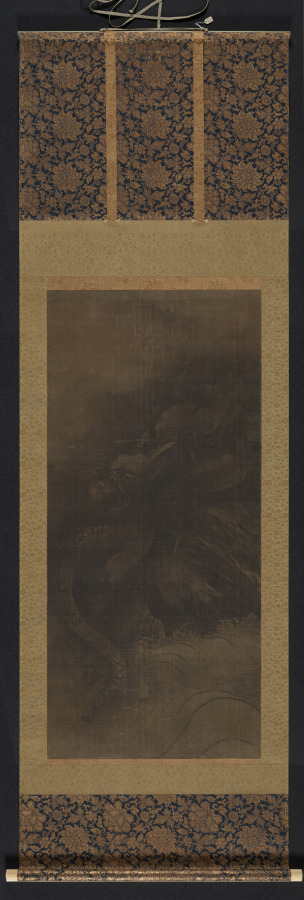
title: Dragon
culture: China, Southern Song dynasty (1127-1279)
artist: Fachang Muqi (Chinese, 1220–1280)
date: c. 1250–79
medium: Hanging scroll; ink on silk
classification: Painting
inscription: 道有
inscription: 雜華室印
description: The dragon and tiger are tied to the philosophical concept of yin and yang, which describes opposite but complementary forces. The dragon occupies a tiered background of waves and mist. Its luminous head emerges from the darker passages, and its narrow twisting body is serpent-like. By contrast, the close-up view of the tiger emphasizes its bulk. The tiger bends its head to lick its paw while its tail curls in the foreground. In their original Chan Buddhist context, this pair of scrolls likely flanked a central image, like the Bodhisattva Guanyin. The silk has darkened over the centuries, and the slight reddish shading in the tiger’s tongue and nose has faded.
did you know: Fachang Muqi was a Chinese Chan Buddhist monk and painter.